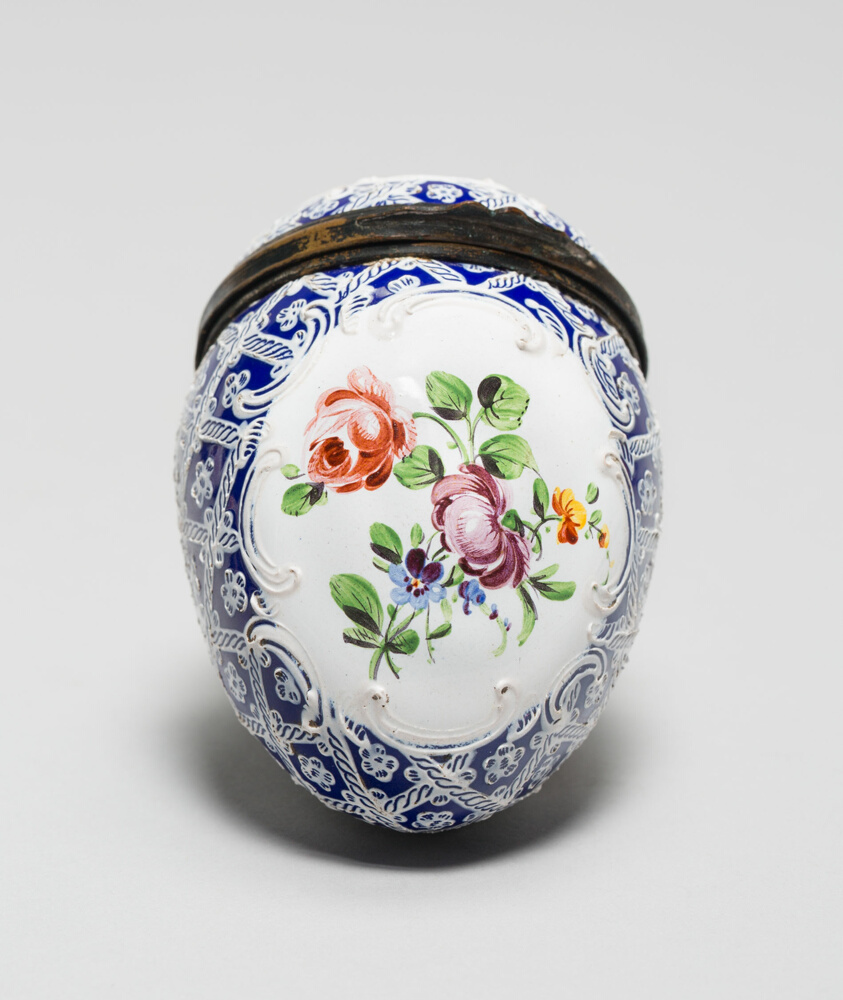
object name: Metalwork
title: Egg-Shaped Box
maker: South Staffordshire, England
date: c. 1755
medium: Metal and enamel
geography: England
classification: enamel; metalwork